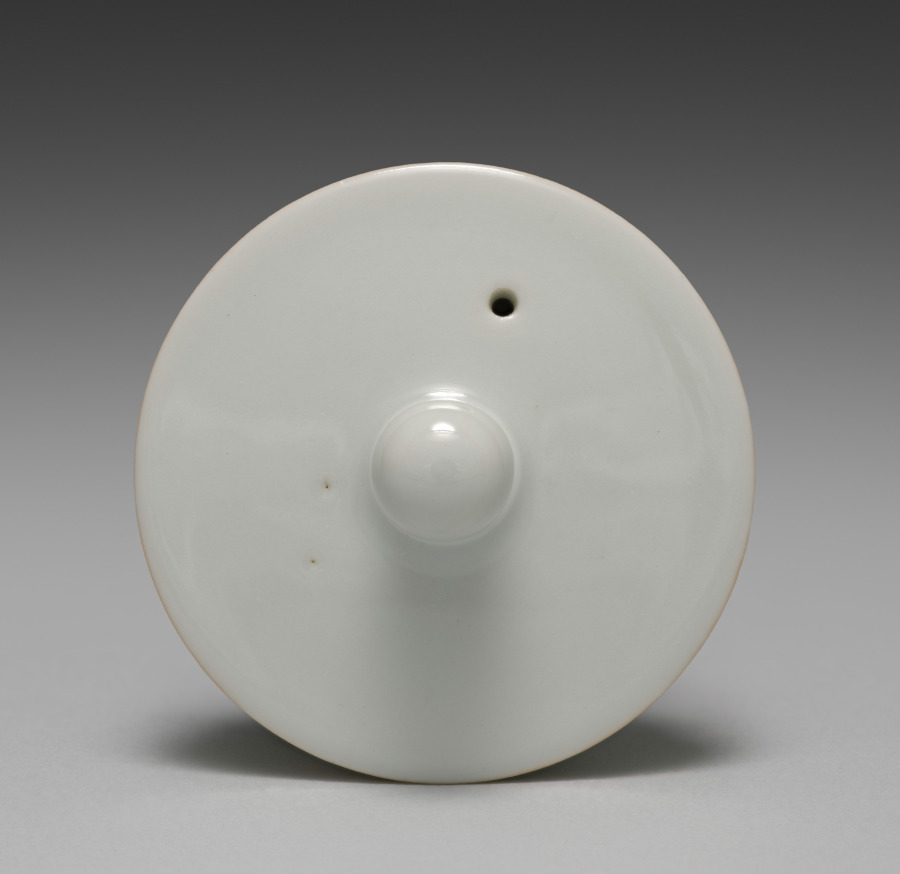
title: Lid for a Sake Pourer with Flowers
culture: Japan, Meiji period (1868–1912)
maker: Seifū Yohei III (Japanese, 1851–1914)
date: 1893–1914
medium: Porcelain with molded design, overglaze color enamel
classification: Ceramic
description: This sake pourer is of a type called a chōshi. It is elaborately decorated with flowers in overglaze enamels in several colors, including black for the contour lines of leaves and stems; orange, white, gold, and two shades of green for the peonies; and purple for the thistles. The white blossoms have been built up with white enamel, then incised for a white-on-white eect; the orange and purple use an absence of color to produce the contours of individual petals. Yohei III referred to his works in multicolor overglaze enamels as “hundred flower brocades” (hyakka nishiki). Two small nyoi (C. ruyi) staff-head motifs, molded in clay and applied to either side of the lid, create handle rests, as well as natural places for the thumb and index finger of one hand to rest, so one can both secure the lid and steady the pour, while the handles are held in the other hand. The top of a nyoi staff resembles the curled cap of the reishi. Such scepters are imagined to be found in the hands of sages, Daoist immortals, or Buddhist deities and connote lofty goings-on and favorable circumstances. Since this sake pourer is unsigned, it may have been made for imperial family members to give as a gift.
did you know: This sake pourer with purple thistles and orange peonies shows off Seifū Yohei III’s technique of enamels painted over the glaze.